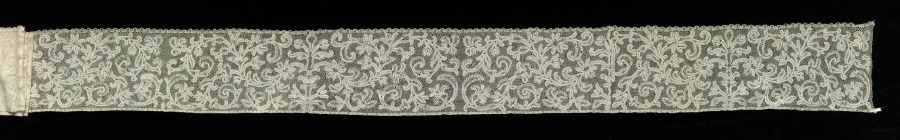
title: Lace Flounce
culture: Italy, Milan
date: 1700s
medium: Bobbin lace (Punto di Milano)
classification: Lace